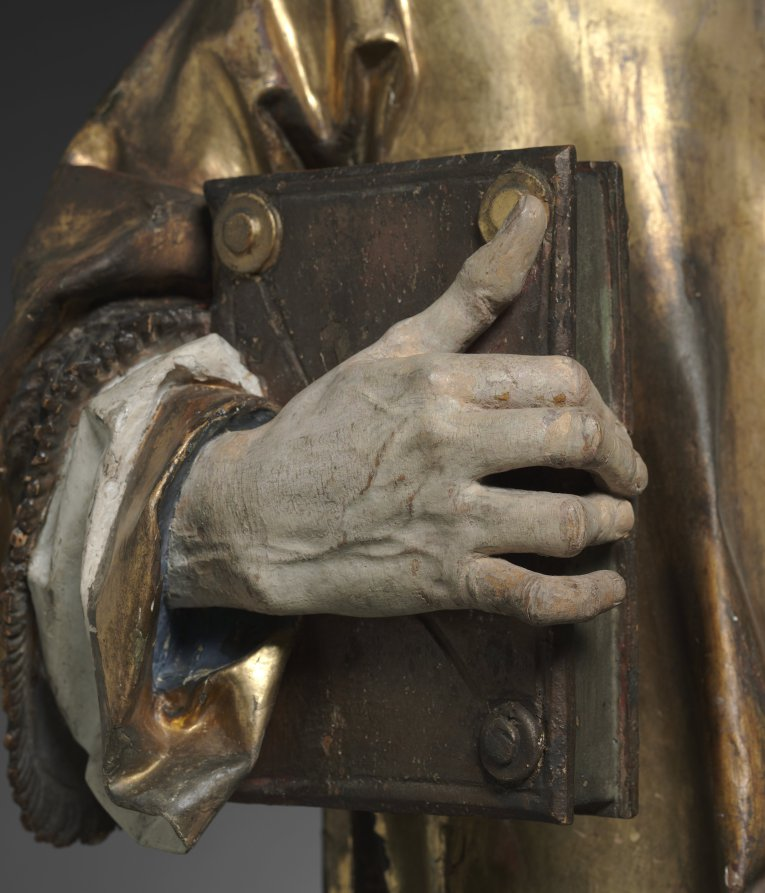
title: Saint Stephen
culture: Germany, Würzburg, 16th century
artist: Tilman Riemenschneider (German, active Würzburg, c. 1460–1531)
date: 1502–8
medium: lindenwood with polychromy and gilding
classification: Sculpture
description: This sculpture, along with that of Saint Lawrence (1959.42) and two others in Germany, are believed to be the remaining fragments of a large altarpiece carved by Riemenschneider for the Dominican convent in Rothenburg in Franconia (demolished in 1813). Saints Stephen and Lawrence both wear the dalmatic to indicate their status as deacons in the early church. Each holds a symbol of his martyrdom; here, Saint Stephen cradles some stones to indicate his death by stoning. Art in Germany through the early 1500s remained firmly anchored in the late Gothic style with its associated interests in realism. Riemenschneider was one of the most prolific and versatile sculptors of this style, a recognized master in both stone and wood. His flourishing workshop employed as many as 40 apprentices in sculpting, woodcarving, and painting. His sculptures are noted for the dreamy, melancholy, and introspective quality in their expressions, as well as their remarkable attention to detail.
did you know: Tilman Riemenschneider (c. 1460–1531) is probably the most famous German sculptor of the period around 1500.